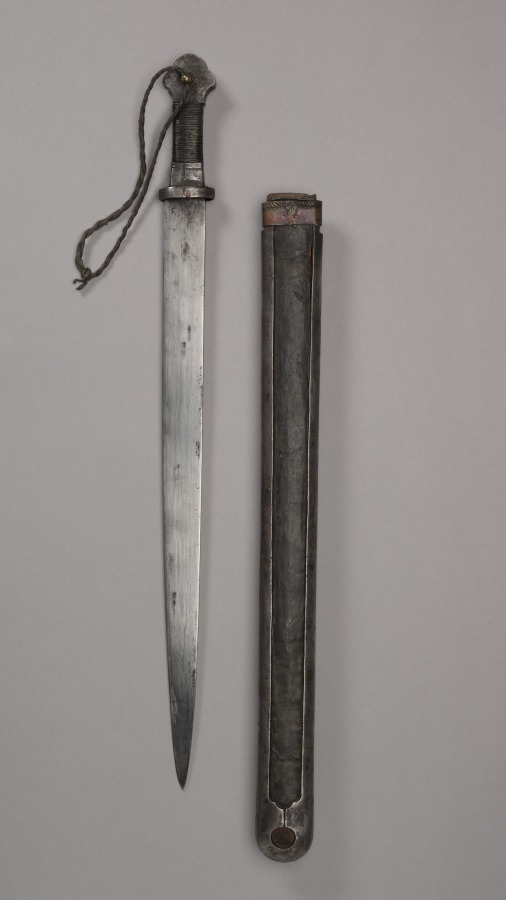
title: Sword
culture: India, Bhutan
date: 1800s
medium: iron with gilt and leather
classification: Arms and Armor